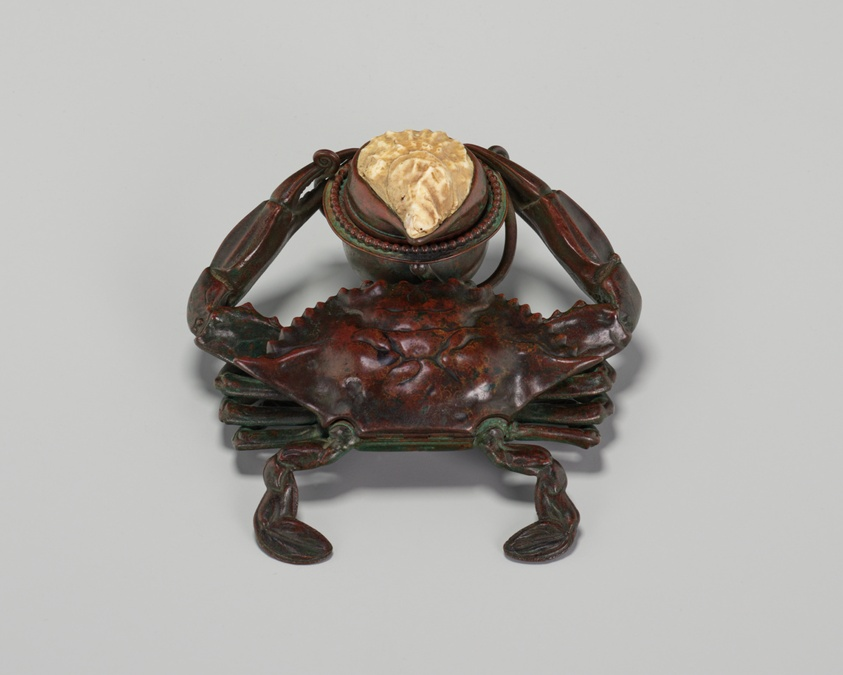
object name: Metalwork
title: “Crab” Inkstand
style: Arts and Crafts Movement, 20th Century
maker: Tiffany Studios (American, 1902–32); Corona, New York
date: c. 1905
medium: Bronze, Favrile glass, and shell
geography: Corona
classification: inkwells; inkwell liners; inkstand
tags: crabs, shells